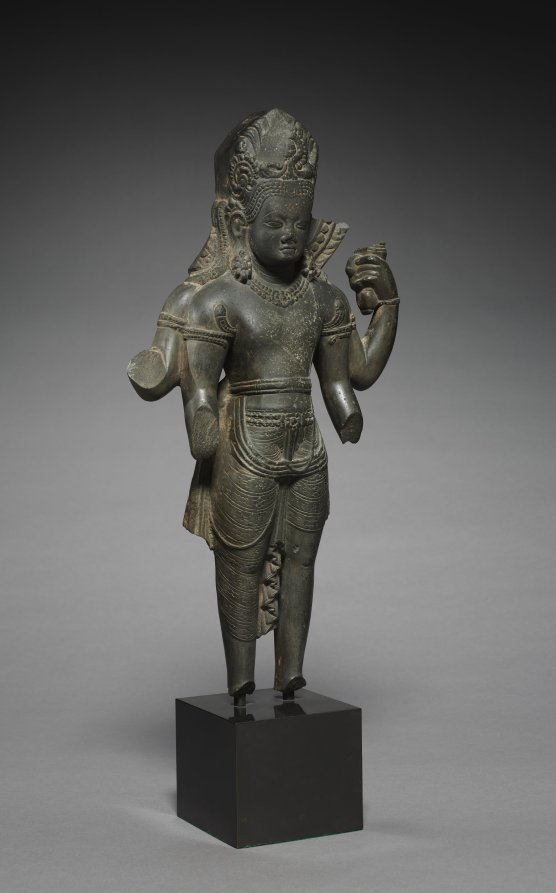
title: Vishnu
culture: Nepal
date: 800s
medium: schist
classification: Sculpture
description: The axial stance and somber expression visually amplify the powerful nature of this four-armed Hindu god. The crown and fine textiles communicate his regal qualities. In his upper left hand, a conch shell signals the start of battle or the sound of OM at the opening of a mantra recited to quell inner demons. Vishnu’s followers glorify his ability to destroy demonic forces that bring imbalance and disorder, both throughout the world and within oneself.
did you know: The dark stone was highly polished and once gleamed like bronze.